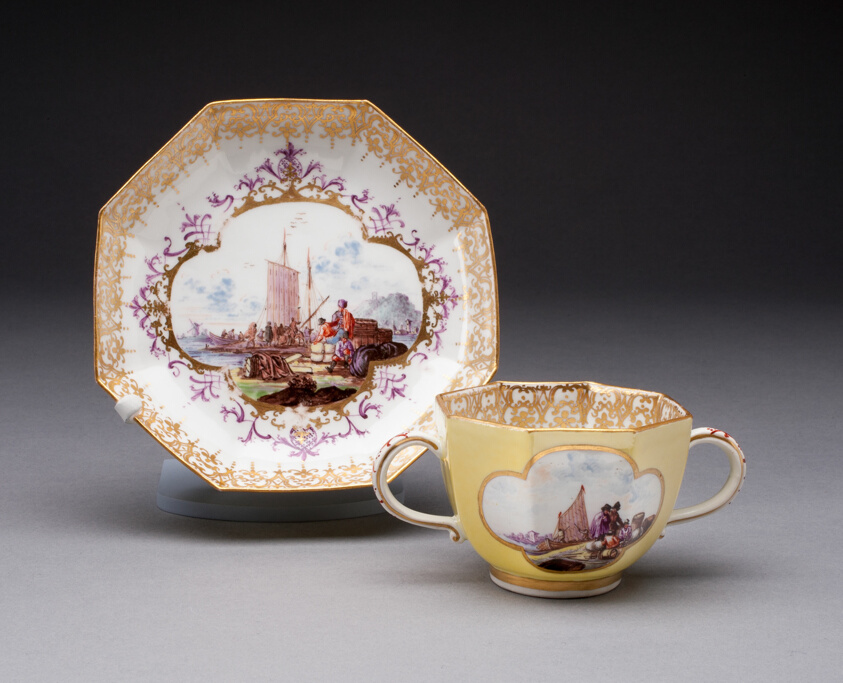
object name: Ceramics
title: Two-handled Cup and Saucer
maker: Meissen Porcelain Manufactory (German, founded 1710)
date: c. 1735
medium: Hard-paste porcelain, yellow ground, polychrome enamels, and gilding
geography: Meissen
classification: drinking vessel; teaware; porcelain; european decorative arts; ceramics